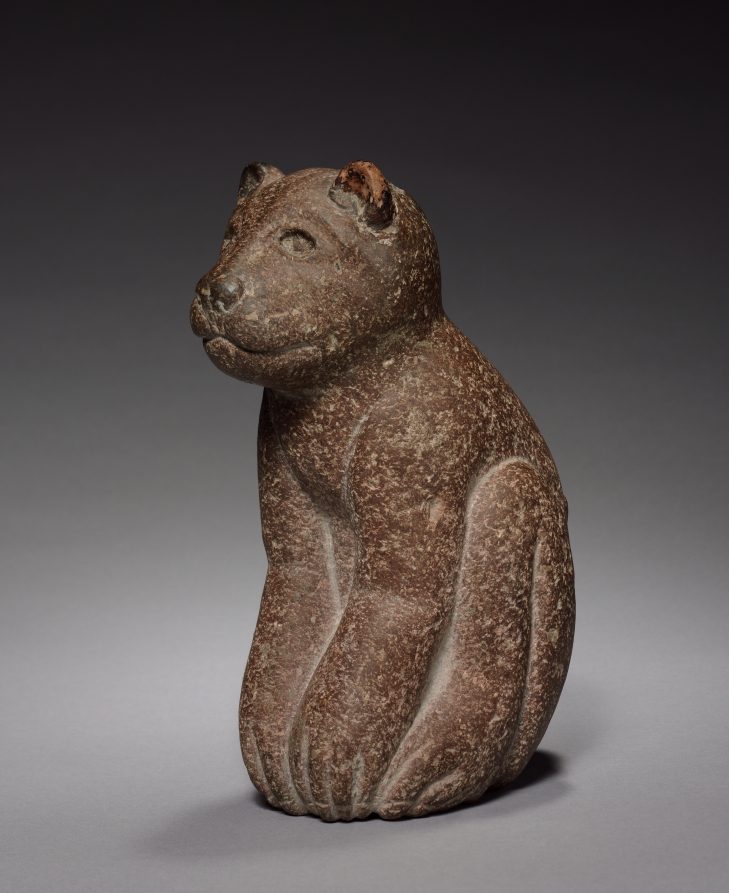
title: Feline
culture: Central Mexico, Aztec, 13th-16th century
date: c. 1200–1519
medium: stone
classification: Sculpture